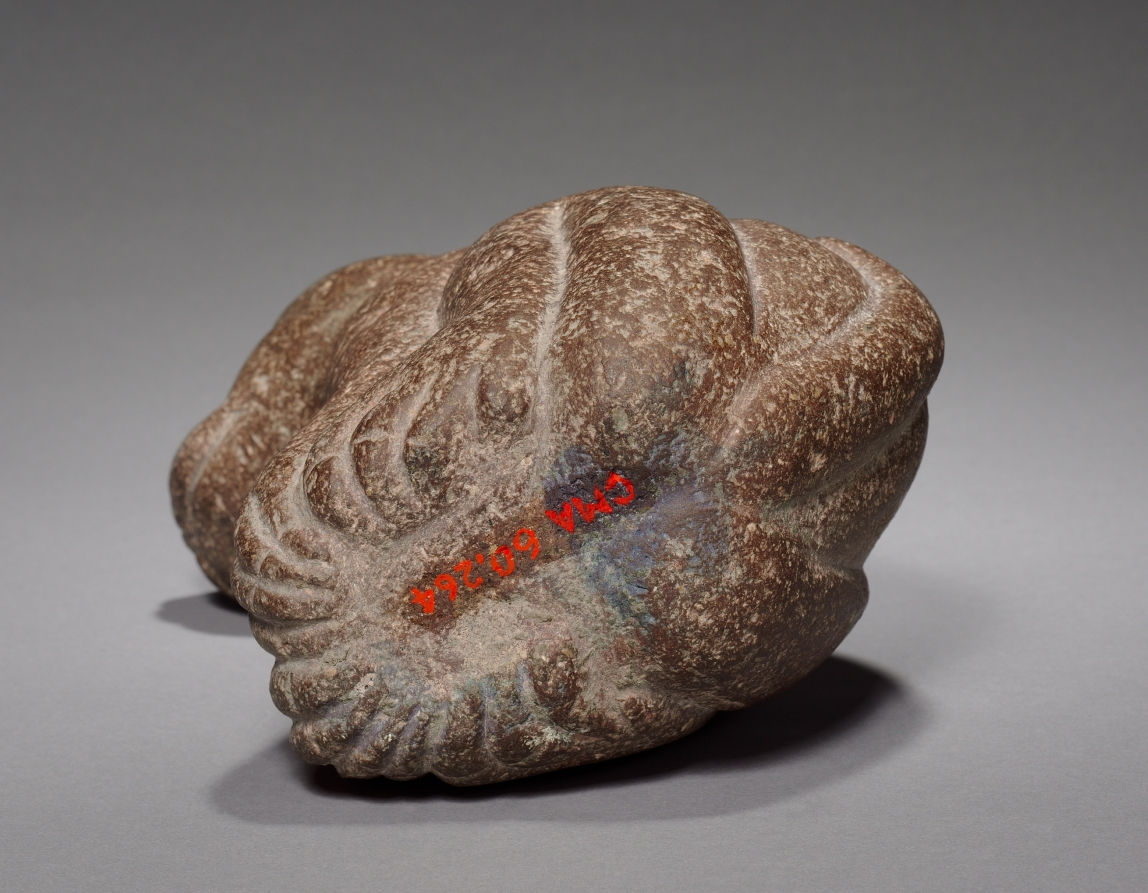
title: Feline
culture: Central Mexico, Aztec, 13th-16th century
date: c. 1200–1519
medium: stone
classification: Sculpture